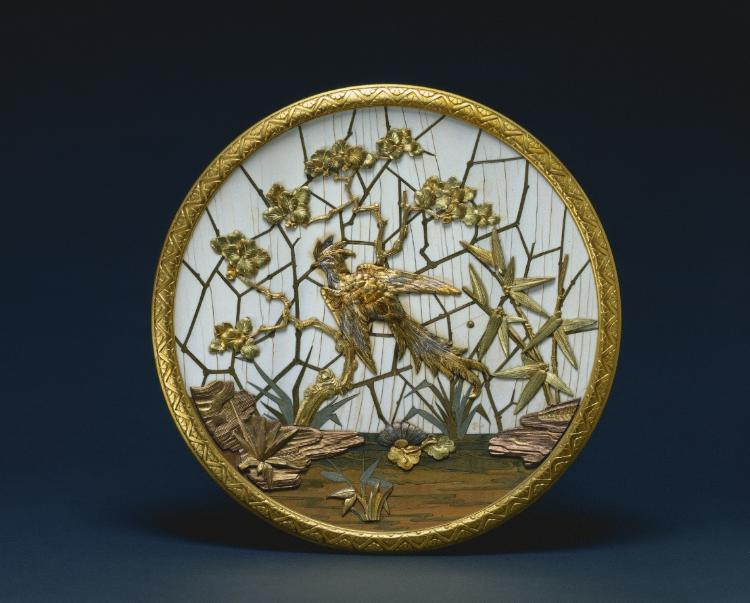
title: Plaque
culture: France, 19th century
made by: Veuve Ferdinand Duvinage (French)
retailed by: Alphonse Giroux (French)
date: c. 1880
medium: metal gilded in several colors of gold, silver-colored metal, ivory, wood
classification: Metalwork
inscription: engraved on back: ALPH GIROUX PARIS